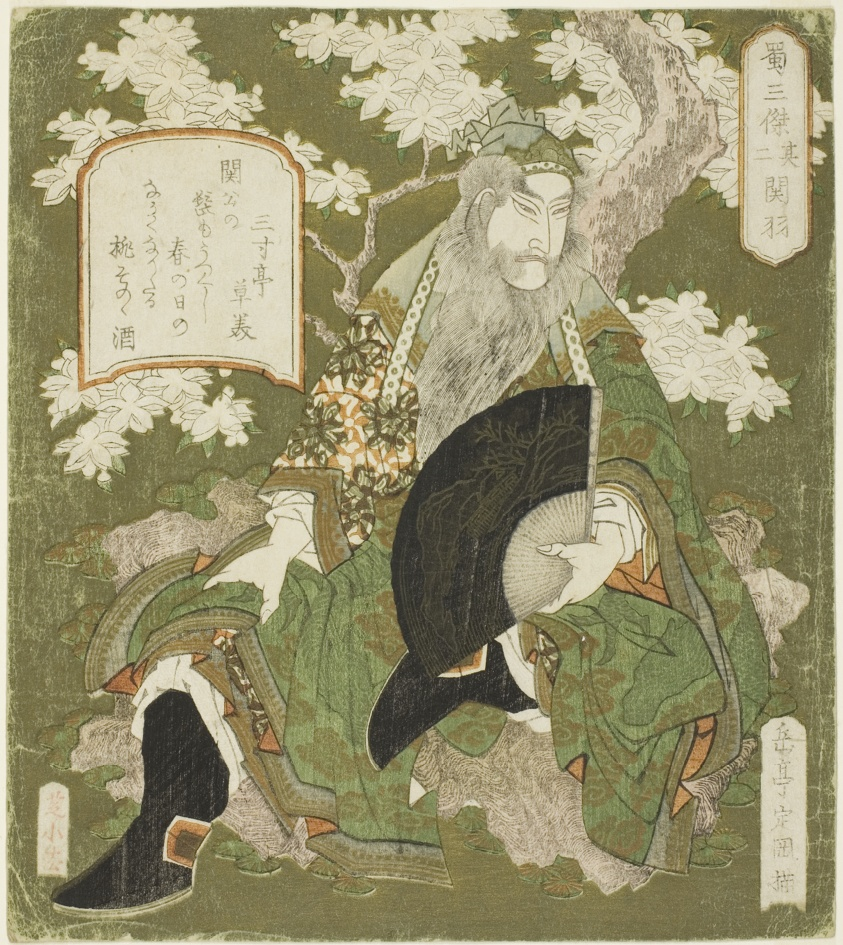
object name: Print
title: No. 2: Guan Yu (Sono ni: Kan'u), from the series "Three Heroes of Shu (Shoku sanketsu)"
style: Japanese (culture or style)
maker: Yashima Gakutei (Japanese, 1786 (?)-1868)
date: c. 1824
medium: Color woodblock print; shikishiban, surimono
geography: Japan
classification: woodblock print; print; asian art